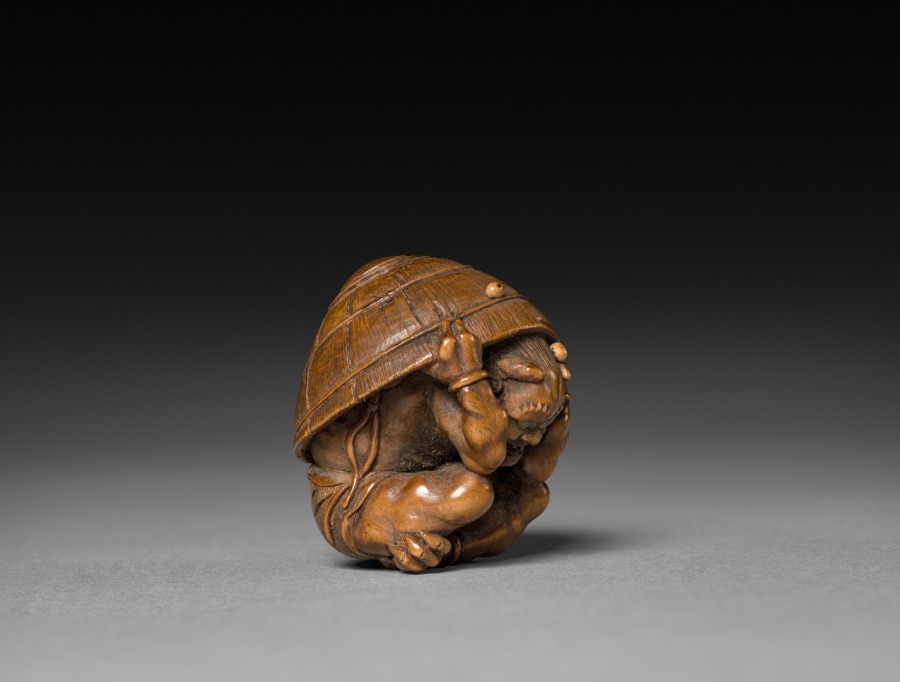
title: Demon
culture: Japan, Edo period (1615–1868)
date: 1615–1868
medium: wood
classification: Netsuke